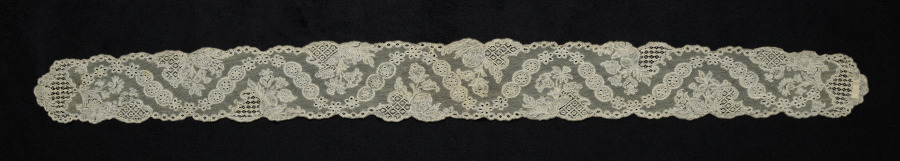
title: Lace Lappet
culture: Belgium, Mechelen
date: 1700s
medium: Linen: bobbin lace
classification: Lace